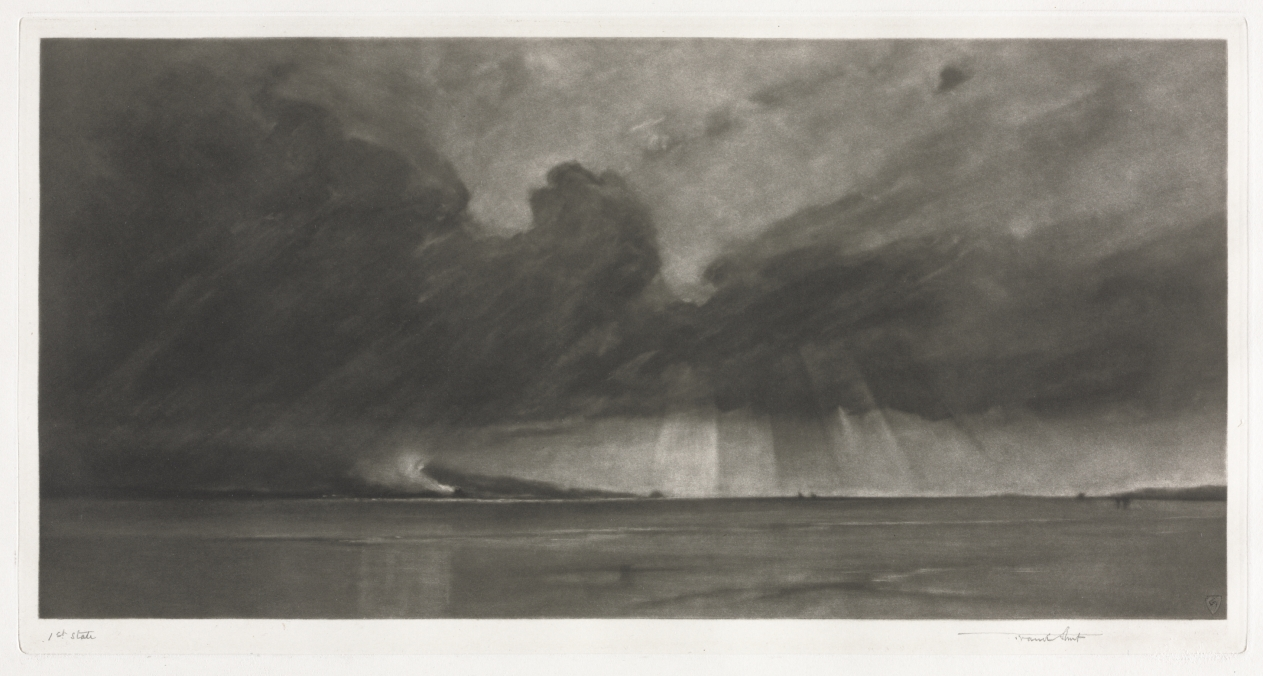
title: Cloud March over the Sands of Dee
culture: England, late 19th-early 20th century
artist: Frank Short (British, 1857–1945)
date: 1929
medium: mezzotint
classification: Print